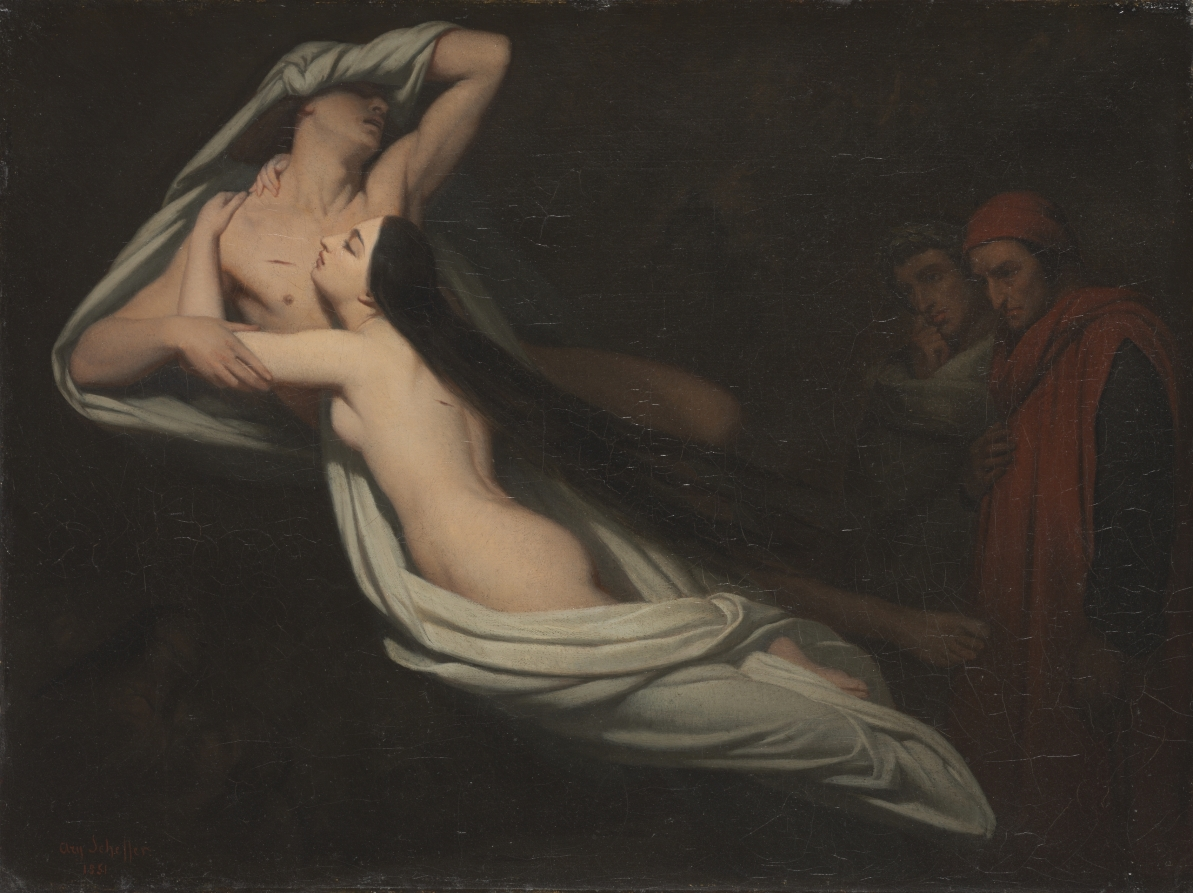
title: Dante and Virgil Meeting the Shades of Francesca da Rimini and Paolo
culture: Netherlands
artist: Ary Scheffer (Dutch, 1795–1858)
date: 1851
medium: oil on fabric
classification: Painting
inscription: Signed lower left corner in red paint: Ary Scheffer. / 1851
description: Based on The Divine Comedy, Dante's epic poem of the 1300s, this painting depicts Dante and the ancient Roman poet Virgil encountering the souls of Paolo and Francesca on a visit to Hell. Although in love with Paolo, Francesca was forced to marry his deformed brother for political reasons. When the jilted husband discovered the lovers embracing, he murdered them, apparently consigning them to Hell due to their adulterous affair.